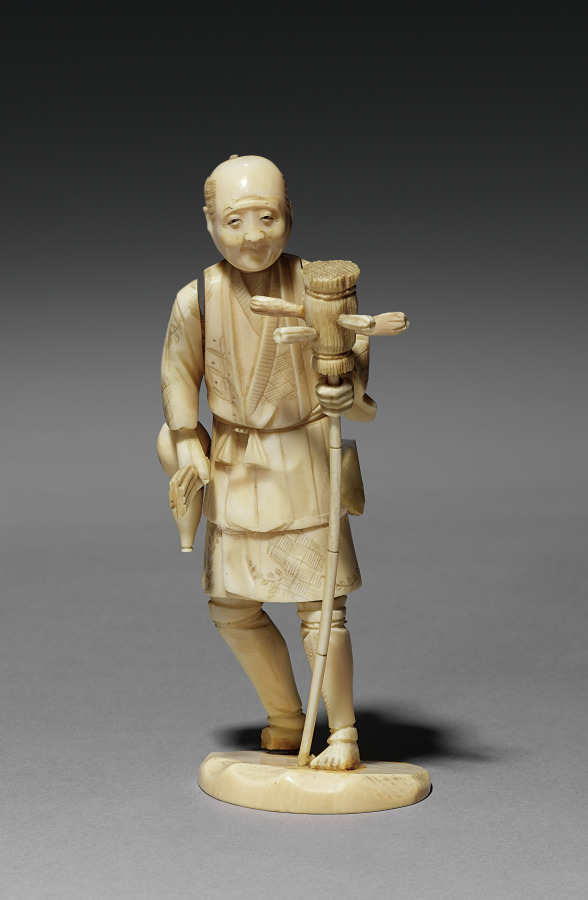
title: Man Holding a Standard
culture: Japan, Meiji period (1868–1912)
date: late 1800s-early 1900s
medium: ivory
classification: Ivory